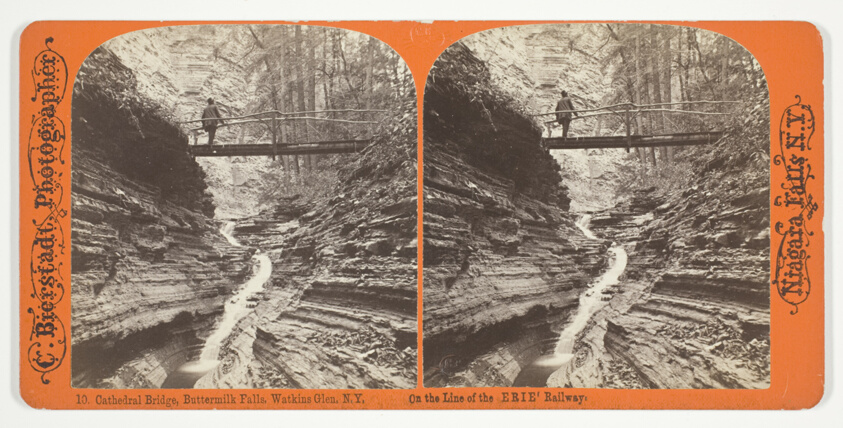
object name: Photograph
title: Cathedral Bridge, Buttermilk Falls, Watkins Glen, N.Y., No. 10 from the series "On the Line of the ERIE, Railway"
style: 19th century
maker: Charles Bierstadt (American, born Germany, 1819–1903)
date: 1863/1903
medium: Albumen print, stereo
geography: United States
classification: stereograph (albumen); albumen silver print; photographic process; photography; photograph